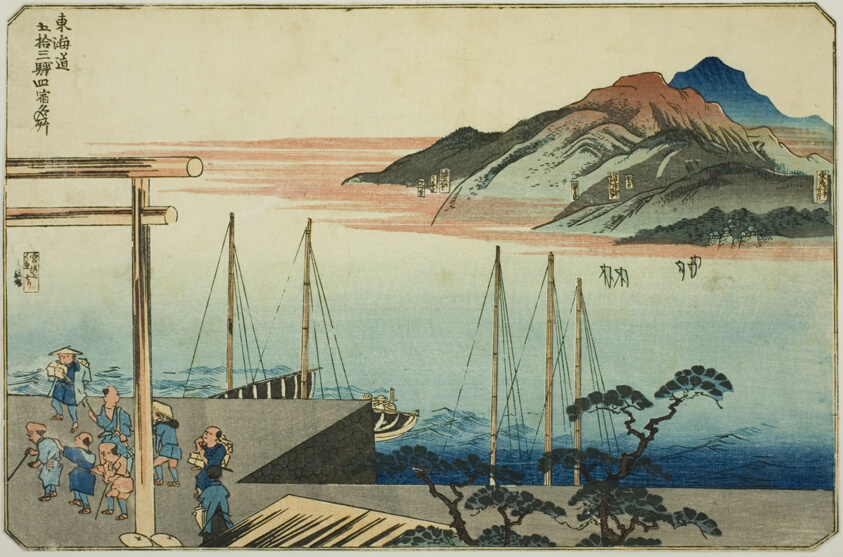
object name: Print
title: Miya, Kuwana, Yokkaichi, and Ishiyakushi, from the series "Famous Places on the Fifty-three Stations of the Tokaido, Four Stations (Tokaido gojusan eki yonshuku meisho)"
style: Japanese (culture or style)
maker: Utagawa Kuniyoshi (Japanese, 1797-1861)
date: c. 1830/35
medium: Color woodblock print; oban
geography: Japan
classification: woodblock print; print; asian art